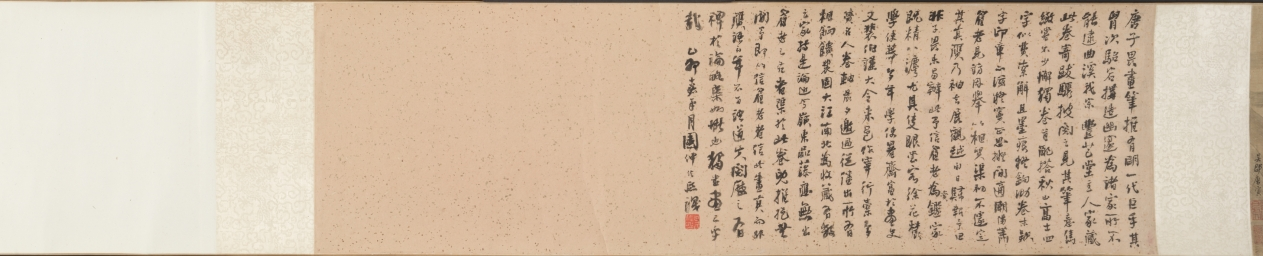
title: Scholar-Hermits in the Autumn Mountains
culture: China, Ming dynasty (1368–1644)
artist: Tang Yin (Chinese, 1470–1523)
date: 1500–1510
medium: handscroll, ink and light color on silk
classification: Painting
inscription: Artist's signature and 2 seals at end of scroll: Tang Yin [seals] T'ang Po-hu; T'ang Tzu'wei t'u-shu.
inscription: Title on frontispiece by Li Cho-kung (dates unknown).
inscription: 1 colophon and 11 additional seals: 1 colophon dated 1915 of Wu Tso-hsi (19th-20th c.); 2 seals of Gao Qifeng 高奇峰 (1889–1933); 5 seals of C. C. Wang 王季遷 (1907–2003); 4 seals unidentified.